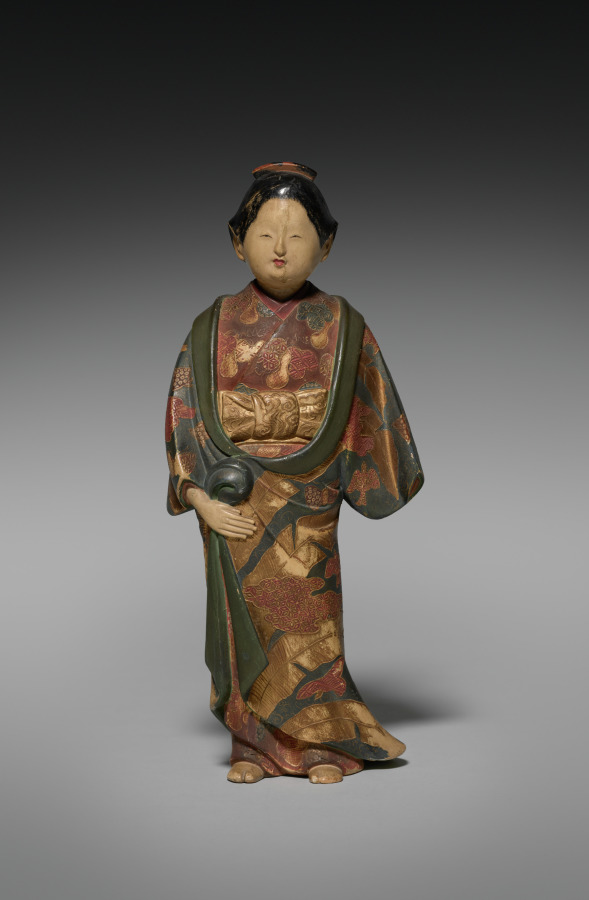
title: Saga Doll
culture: Japan, Edo period (1615–1868)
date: 1688–1703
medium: lacquered wood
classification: Sculpture